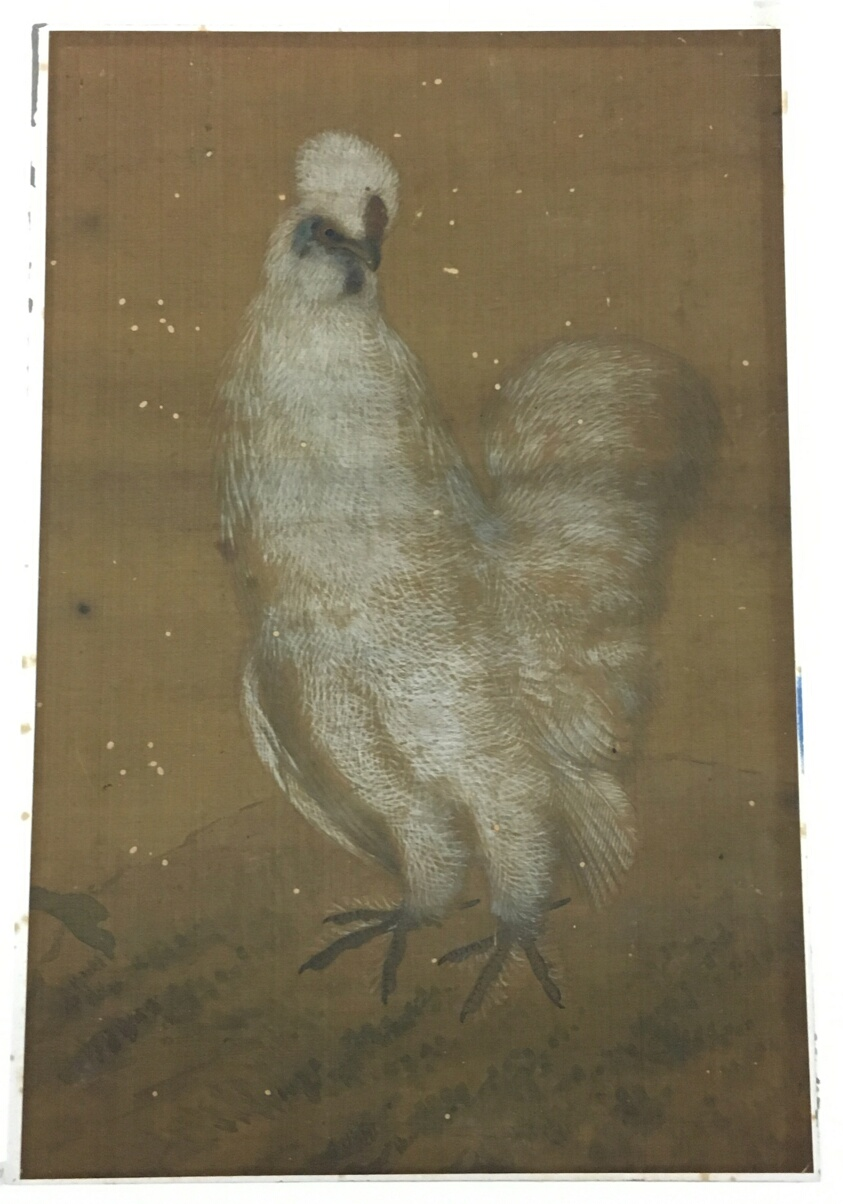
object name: Painting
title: White Rooster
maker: Artist unknown; Chinese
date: Ming dynasty (1368–1644)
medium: Framed; ink and light color on silk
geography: China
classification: album leaf; painting; asian art